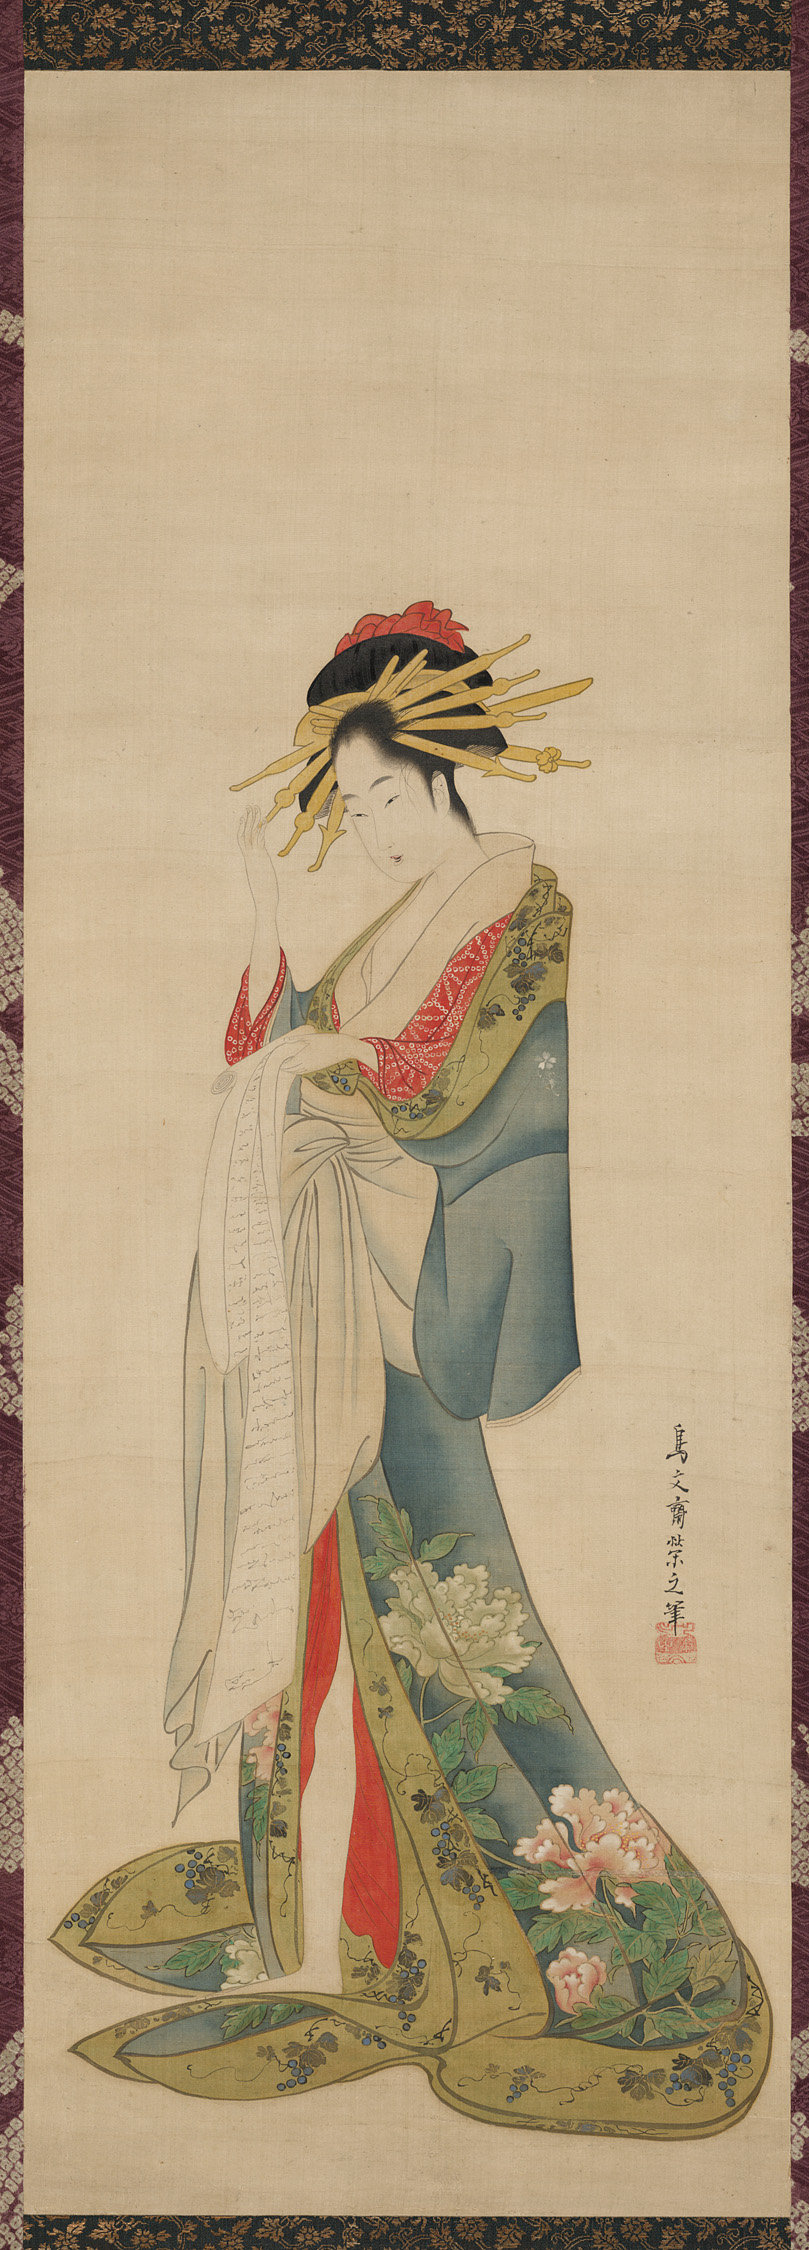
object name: Painting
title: A Courtesan Reading a Letter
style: Japanese (culture or style)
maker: Chôbunsai Eishi (Japanese, 1756-1829)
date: 1820/25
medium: Hanging scroll; ink and color on silk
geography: Japan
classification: hanging scroll; painting; asian art